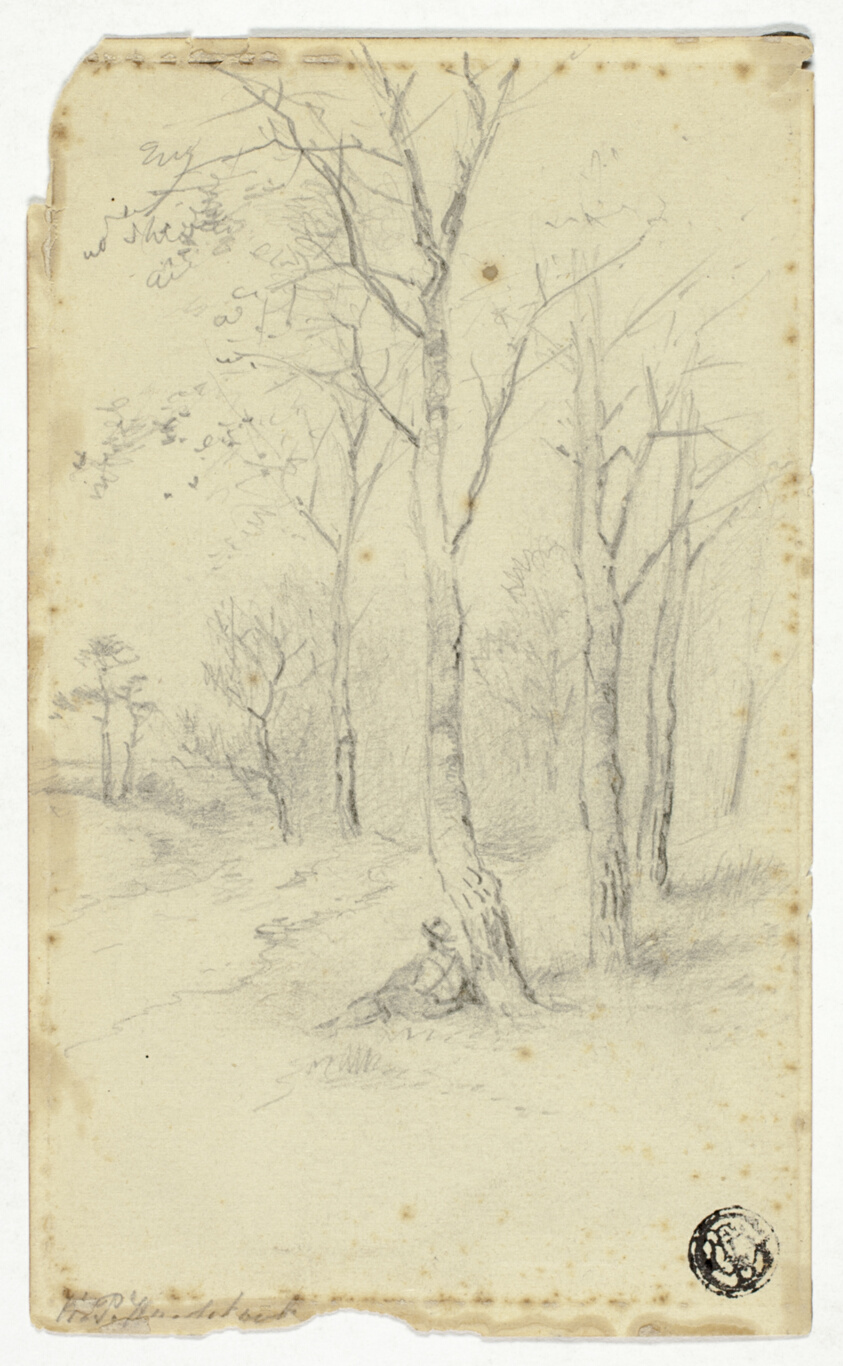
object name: Drawing and Watercolor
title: Man Sitting Under Trees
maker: Hendrik Pieter Koekkoek (Dutch, 1843-c. 1890)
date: c. 1877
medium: Graphite on cream wove paper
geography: Holland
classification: graphite; drawings (visual works); prints and drawing